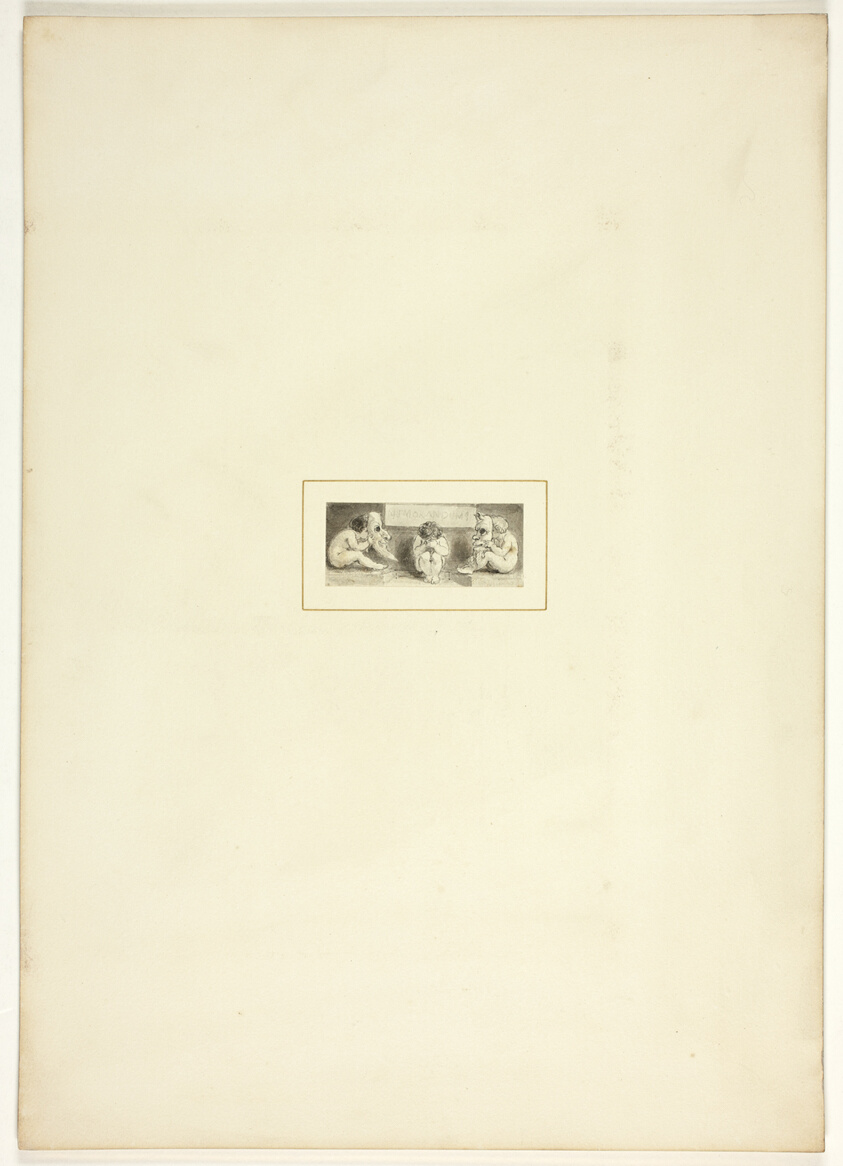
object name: Drawing and Watercolor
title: Study for a plate from The Task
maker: Thomas Stothard (English, 1755-1834)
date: c. 1800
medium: Ink wash on paper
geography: England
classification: ink or chalk wash; drawings (visual works); prints and drawing